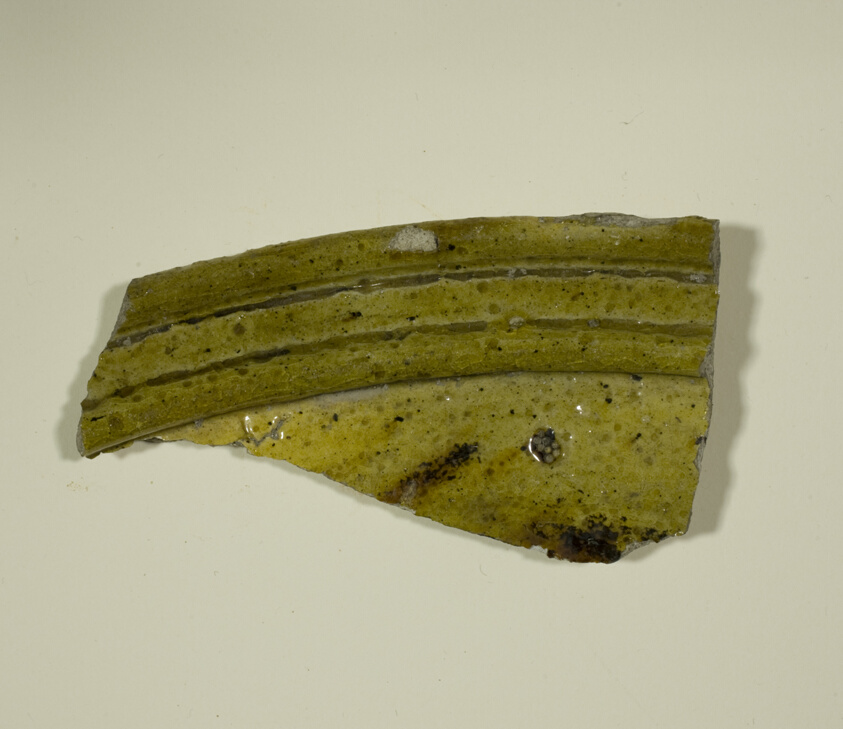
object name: Decorative Arts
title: Fragment of a Bowl with Double Molded Rim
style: byzantine, european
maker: Byzantine, western Greece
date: 13th-14th century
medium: Ceramic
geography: Istanbul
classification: fragment; ceramics; vessel; bowl; asian art; decorative arts